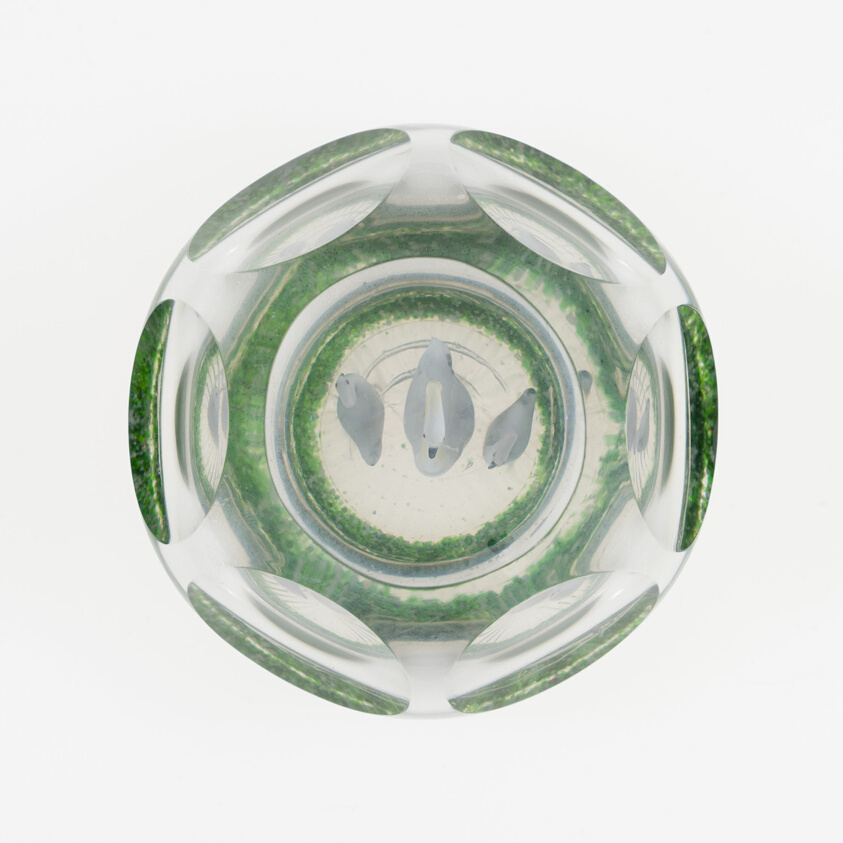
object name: Glass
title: Paperweight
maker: Baccarat Glassworks (Cristalleries de Baccarat); Lorraine, France, founded 1764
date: 19th century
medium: Glass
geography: Baccarat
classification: paperweight; glass